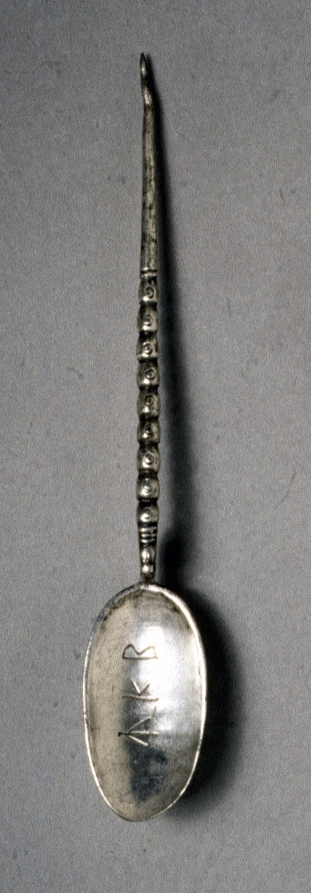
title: Spoon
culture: Byzantium, Syria(?), Byzantine period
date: 300s CE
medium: silver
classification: Metalwork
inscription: Greek inscription the center of the bowl.